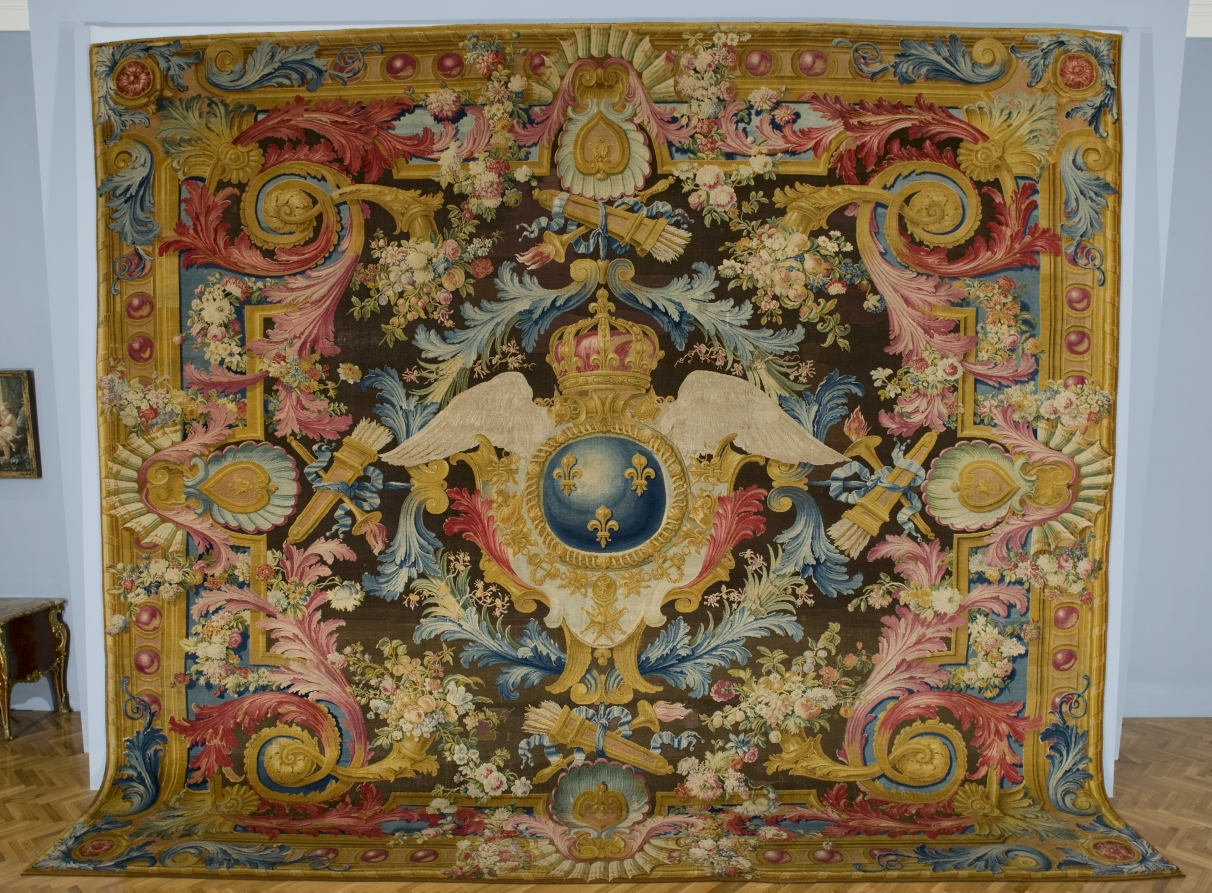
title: Louis XV Savonnerie Carpet with Royal Arms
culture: France, 18th century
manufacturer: Royal Savonnerie Manufactory, Chaillot Workshops (French, est. 1627)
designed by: Pierre Josse Perrot (French)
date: c. 1740–50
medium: Savonnerie knotted pile (symmetrical ruf knot), wool, hemp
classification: Carpet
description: This spectacular carpet, one of three with this royal pattern, was originally designed for Louis XV’s dining room at chateau La Muette by the prominent Savonnerie artist Pierre-Josse Perrot in 1735. The royal arms of France on the orb are topped by a crown with eagle’s wings. Cornucopia issue from corner pieces that alternate with military trophies. The lively artistic style was simplified for faster weaving and a brown ground was used to heighten the brilliant colors.The Savonnerie factory was founded in the early 1600s to create French versions of Oriental carpets, whose import had created a drain on the economy. The technique, copying Turkish carpets, has wool pile formed with symmetrical rug-knots, wool warps, and hemp wefts.